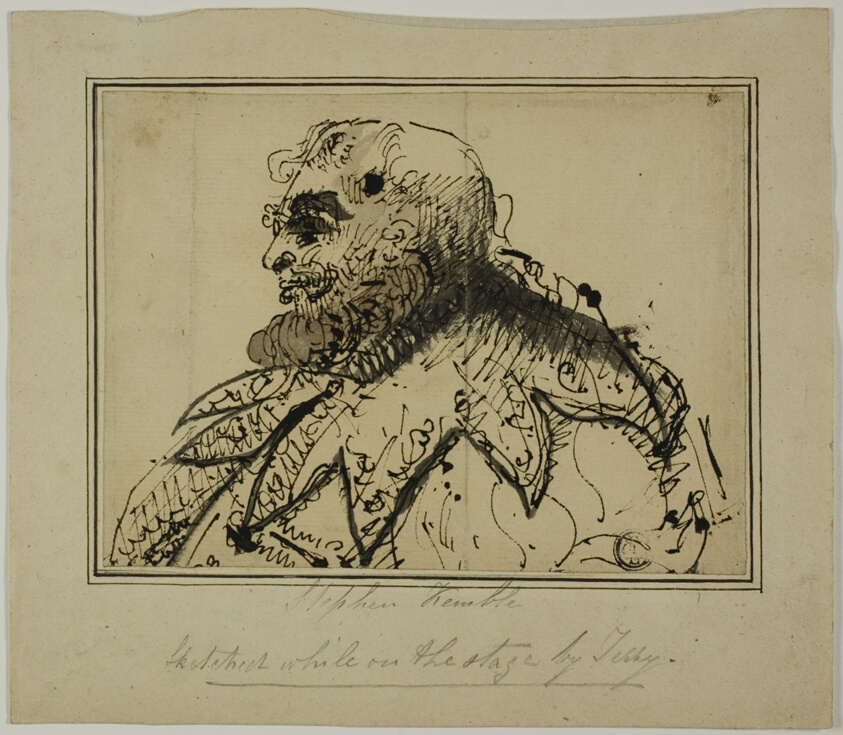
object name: Drawing and Watercolor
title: Stephen Kemble on the Stage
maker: Daniel Terry (Scottish, 1770-1829)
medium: Pen and brown ink, with brush and gray and brown wash, on tan laid paper, edge mounted on cream wove paper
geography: Scotland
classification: pen and ink drawings; drawings (visual works); prints and drawing